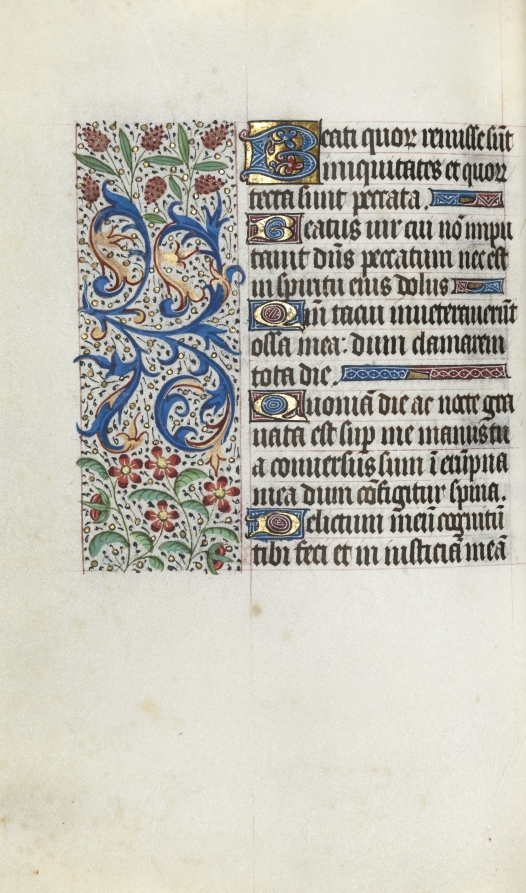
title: Book of Hours (Use of Rouen): fol. 81v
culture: France, Rouen, 15th century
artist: Master of the Geneva Latini (French, active Rouen, 1460–80)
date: c. 1470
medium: ink, tempera, and gold on vellum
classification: Bound Volume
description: In the late 1400s and early 1500s Rouen was an established and important center of book production. The city’s cathedral had a wealthy chapter that spent large sums of money to commission books and to maintain its extensive library. The stationers and booksellers would have likely been concentrated in or near the cathedral precinct. This artist, named after a manuscript now in Geneva, was Rouen’s principal illuminator during the second half of the 1400s.